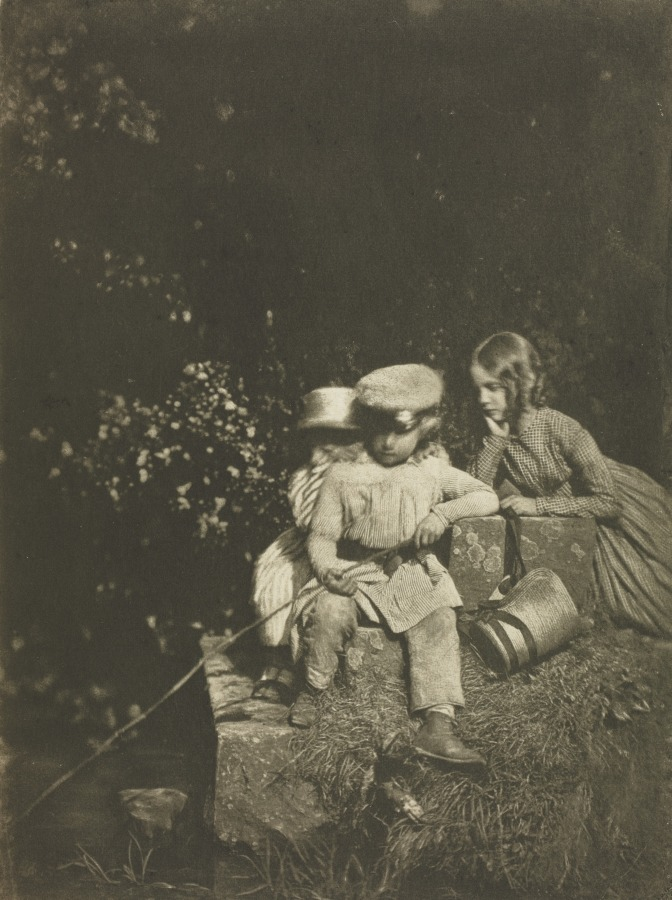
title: Camera Work: The Minnow Pool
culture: England, 20th century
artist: David Octavius Hill (British, 1802–1870)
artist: and Robert Adamson (British, 1821–1848)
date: 1909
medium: photogravure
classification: Bound Volume